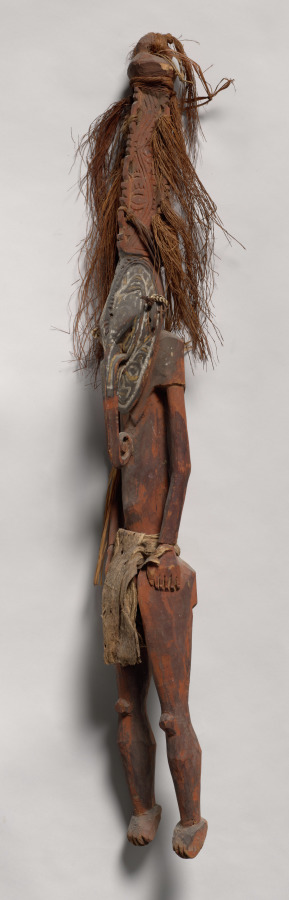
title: Ancestral Figure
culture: Melanesia, Papua New Guinea, Sepik River region, 19th century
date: 1800s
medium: painted wood with fiber and tapa cloth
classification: Sculpture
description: In the Sepik River region, village social and ceremonial life centers on the men's house. Ritual objects such as slit gongs, orators' stools, and flutes are stored there; the most sacred objects are kept hidden from women and children. Carved wooden figures, which probably represent ancestors, were preserved in the men's houses.